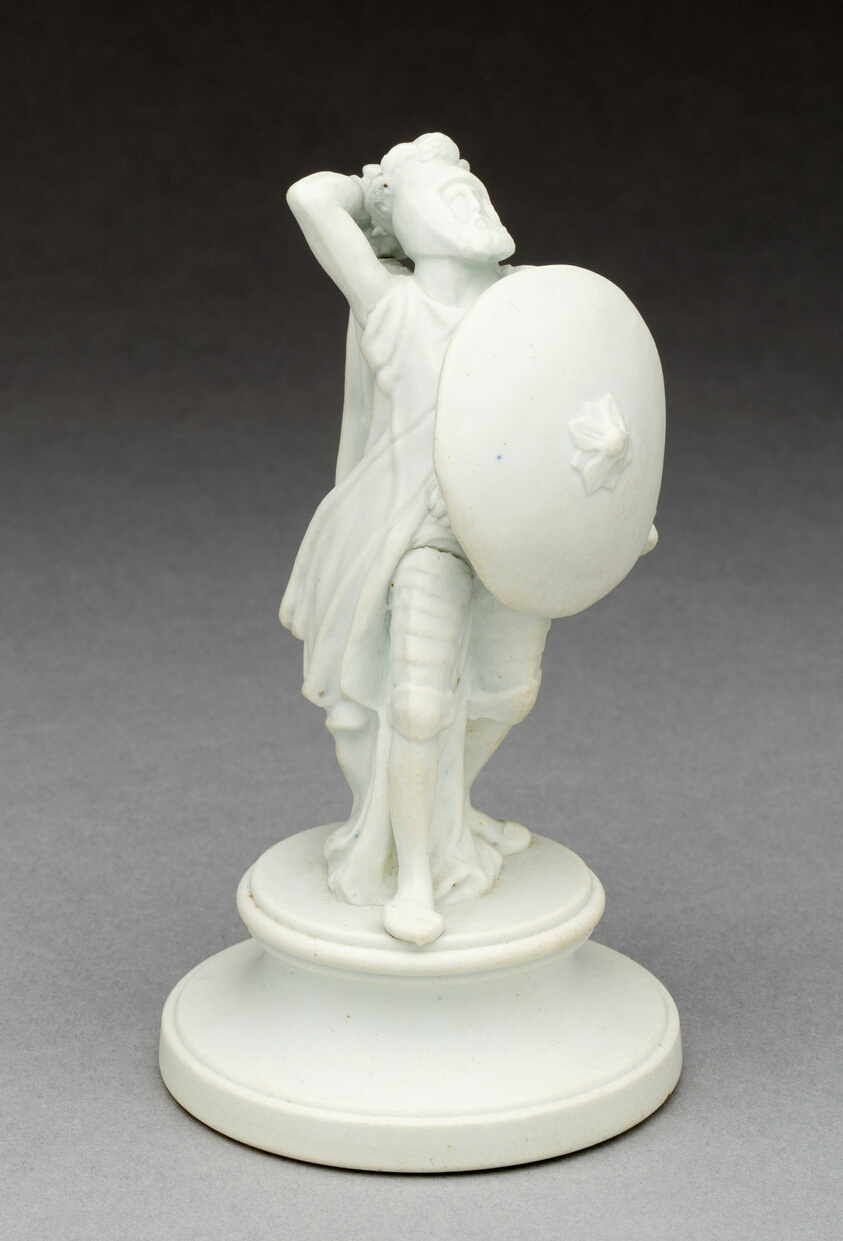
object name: Ceramics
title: Chess Piece: King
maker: Wedgwood Manufactory (England, founded 1759)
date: Late 18th century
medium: Stoneware: white jasperware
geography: Burslem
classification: accessories (object genre); stoneware; european decorative arts; ceramics